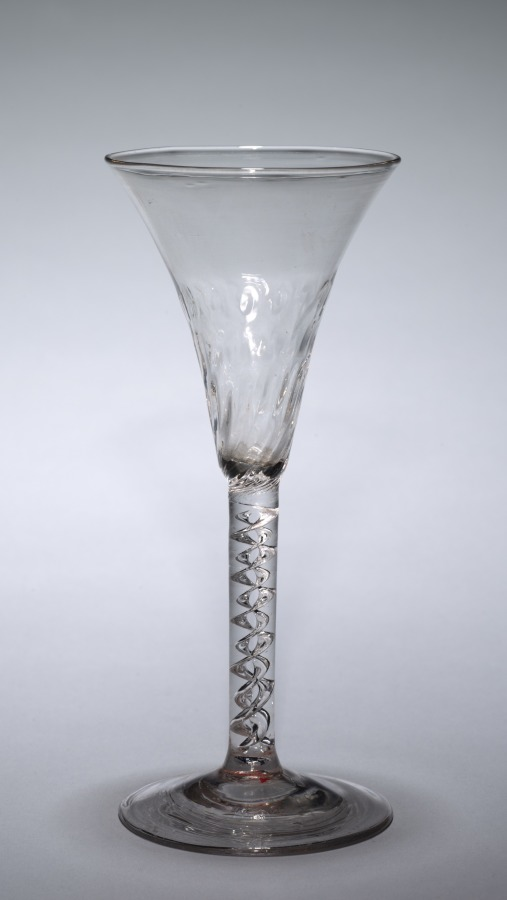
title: Wine Glass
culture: England, 18th century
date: 1740–1750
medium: glass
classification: Glass